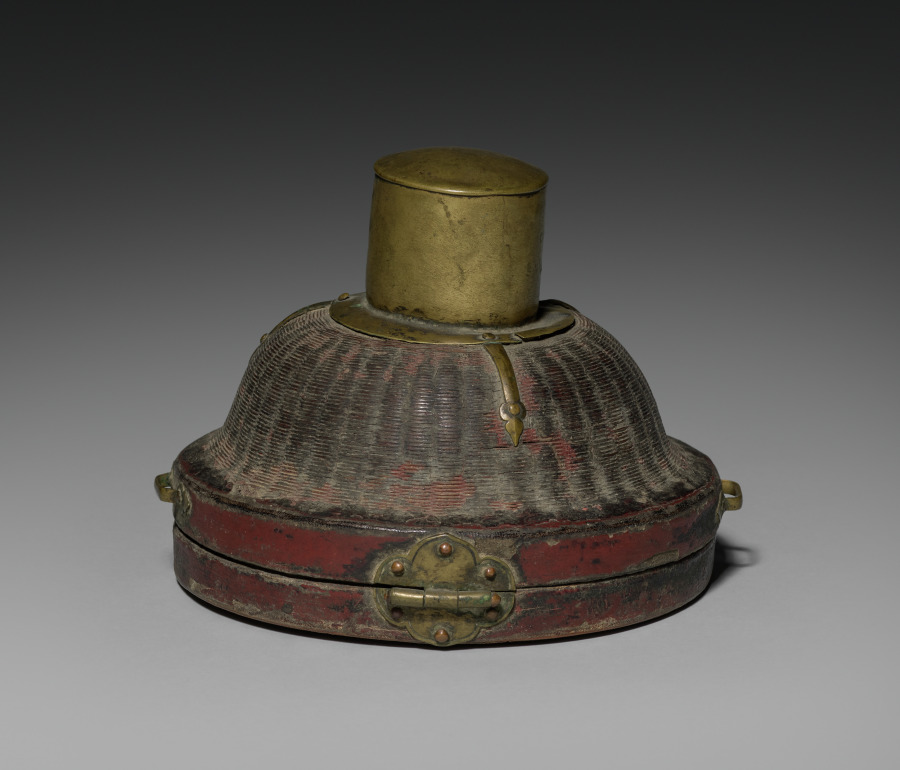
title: Stem Cup with Buddhist Emblems (case)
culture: China, Yuan dynasty (1271-1368)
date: 1300s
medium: wicker and wood with metal fittings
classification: Miscellaneous